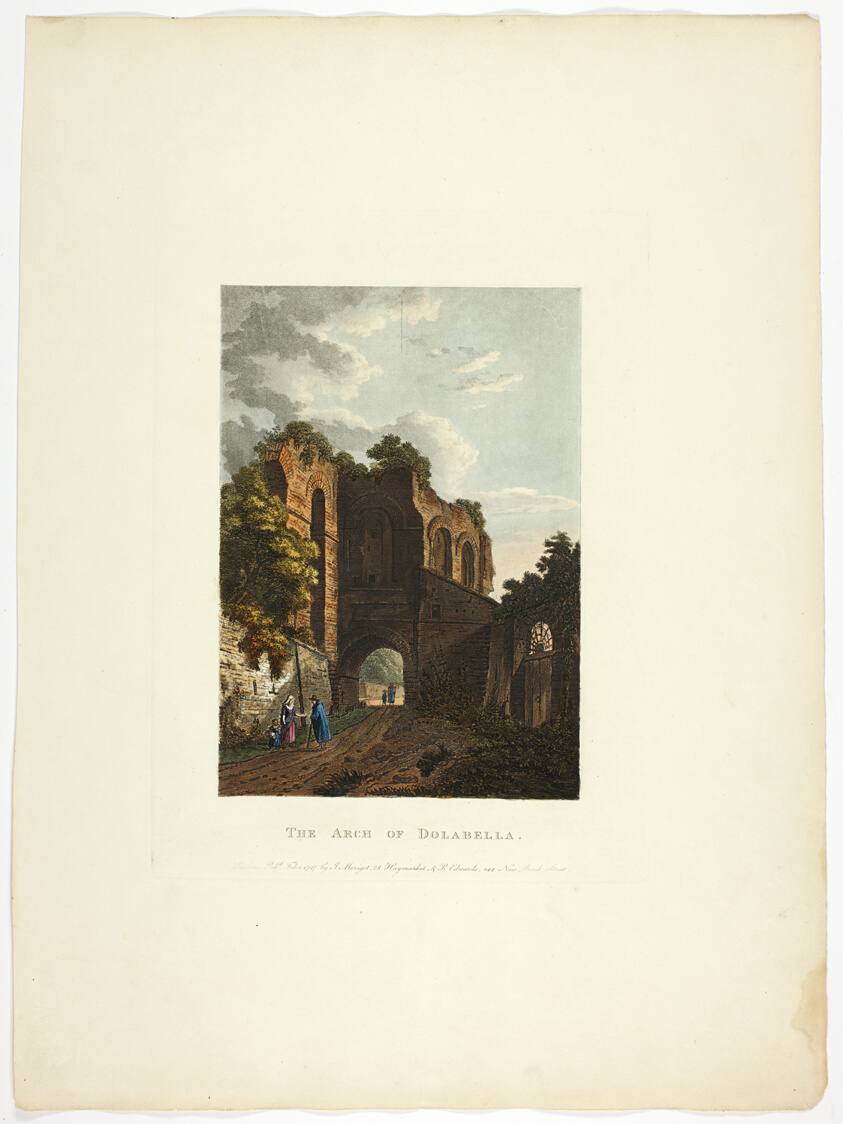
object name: Print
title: The Arch of Dolabella, plate thirty-five from the Ruins from the Rome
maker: M. Dubourg, (English, active 1786-1838); published by J. Merigot (Italian, Unknown)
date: published February 1, 1797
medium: Hand-colored aquatint on paper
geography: England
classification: aquatint; print; prints and drawing